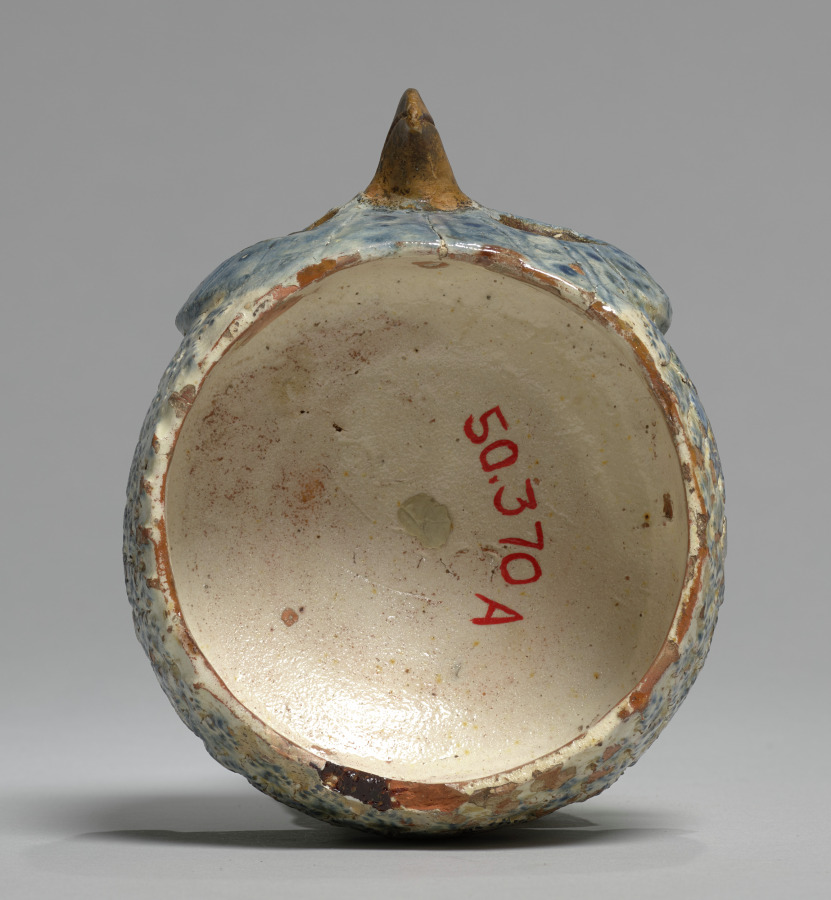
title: Owl (head)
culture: Southern Germany, 16th century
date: 1540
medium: faience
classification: Ceramic